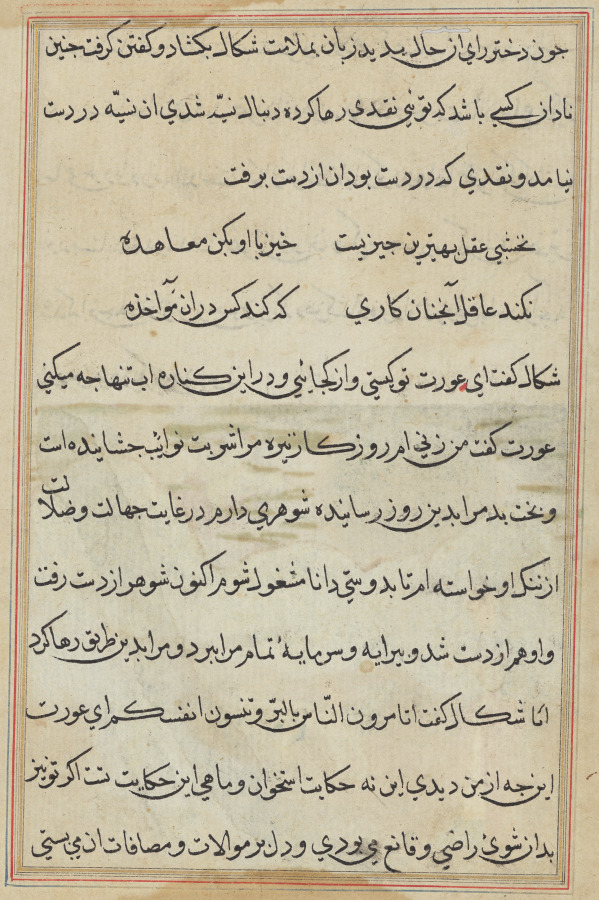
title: Page from Tales of a Parrot (Tuti-nama): text page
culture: Mughal India, court of Akbar (reigned 1556–1605)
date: c. 1560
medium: gum tempera, ink, and gold on paper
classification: Painting